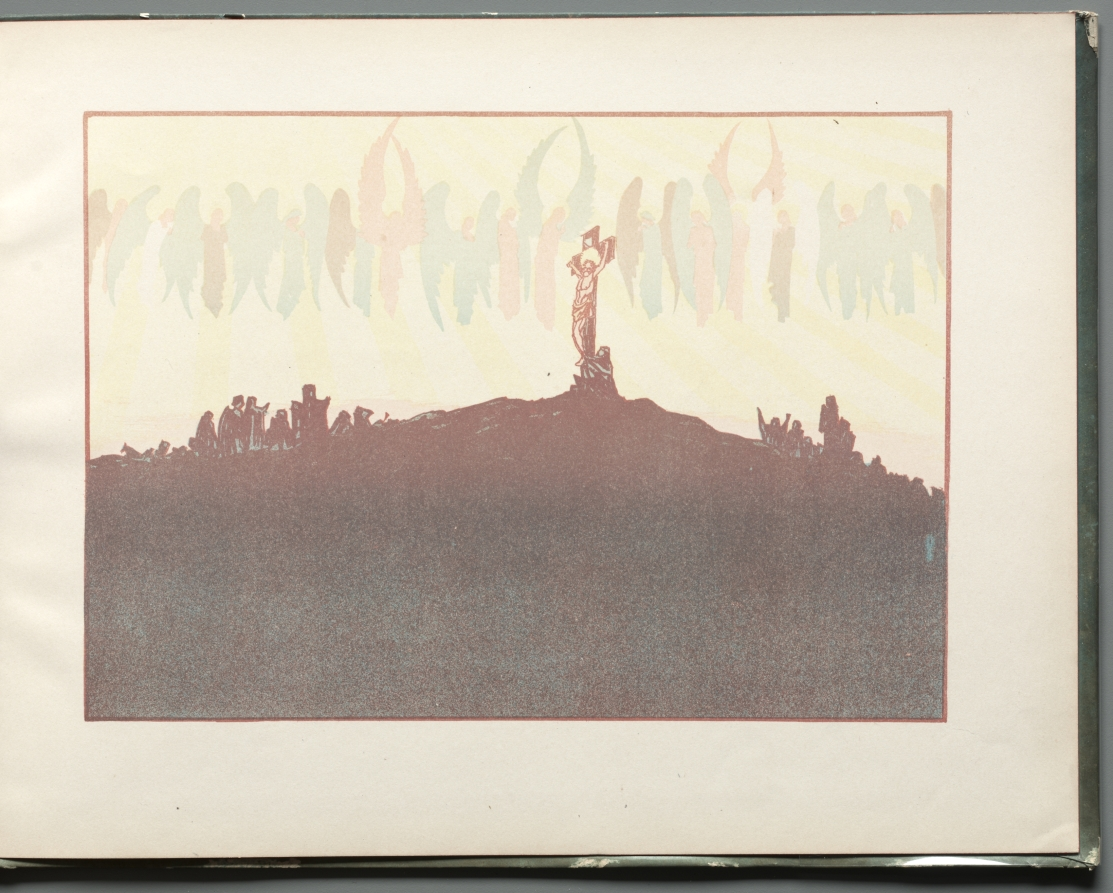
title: The Progress of the Stars: Apothéose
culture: France, 19th century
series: Bound Volume illustrating the poetry and music of Georges Fragerolle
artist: Henri Rivière (French, 1864–1951)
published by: C. Marpon & Flammarion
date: 1890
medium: 18 color lithographs in a Bound Volume illustrating the poetry and music of Georges Fragerolle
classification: Bound Volume